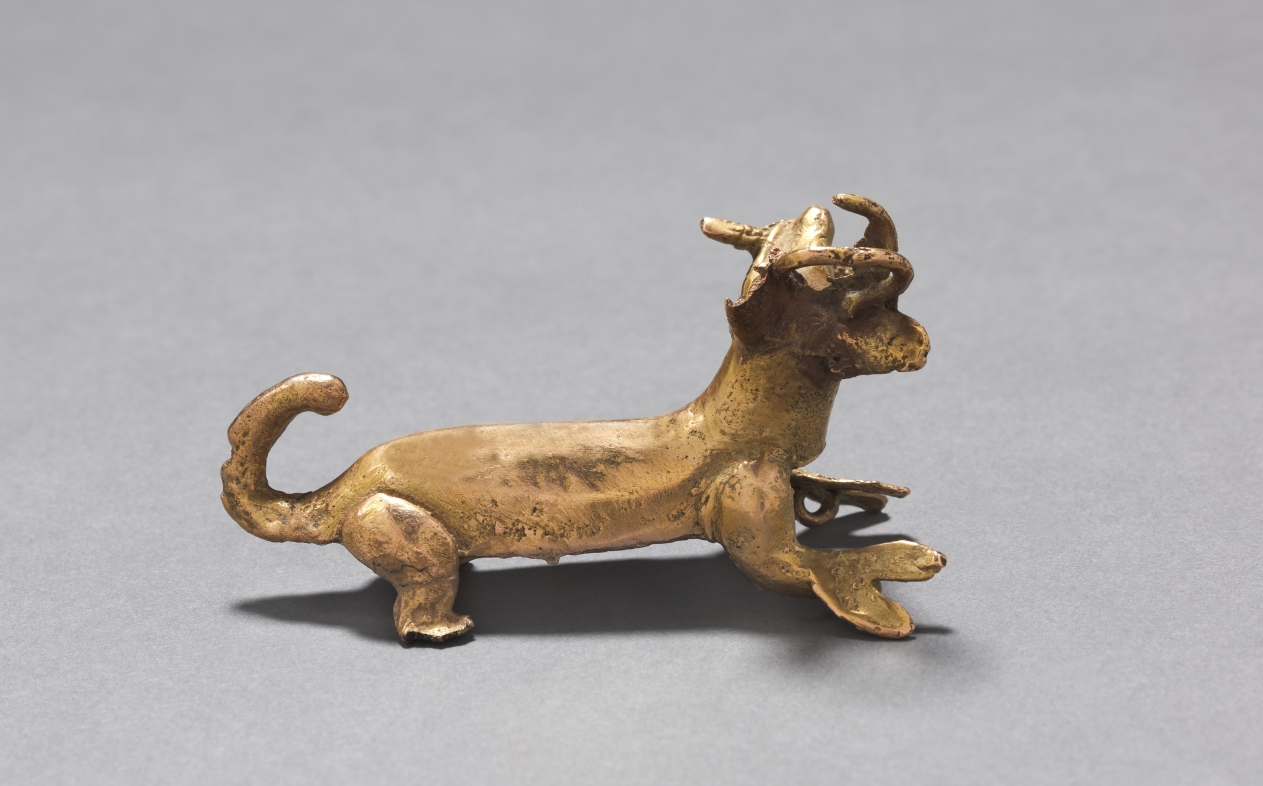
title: Deer Eating Corn Pendant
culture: Southern Costa Rica, (Diquís Region), Diquís Style, 11th-16th century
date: c. 1000–1550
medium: cast gold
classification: Metalwork